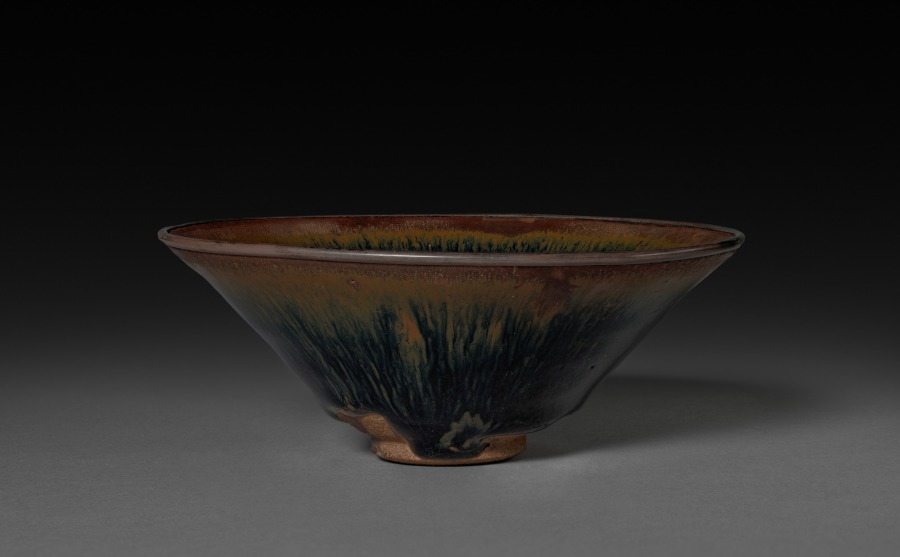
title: Tea Bowl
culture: China, Fujian province, Song dynasty (960-1279)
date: 960– 1279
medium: brown stoneware with iron slip glaze, Jian ware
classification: Ceramic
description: This tea bowl's coarse brown stoneware body was first covered with a thick, blue-black glaze. It was mottled with reddish-brown slip, whose pattern of streaks and spots are affectionately termed "hare's fur" among connoisseurs.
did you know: Jian ware was very popular with the tea cultures in China and Japan.